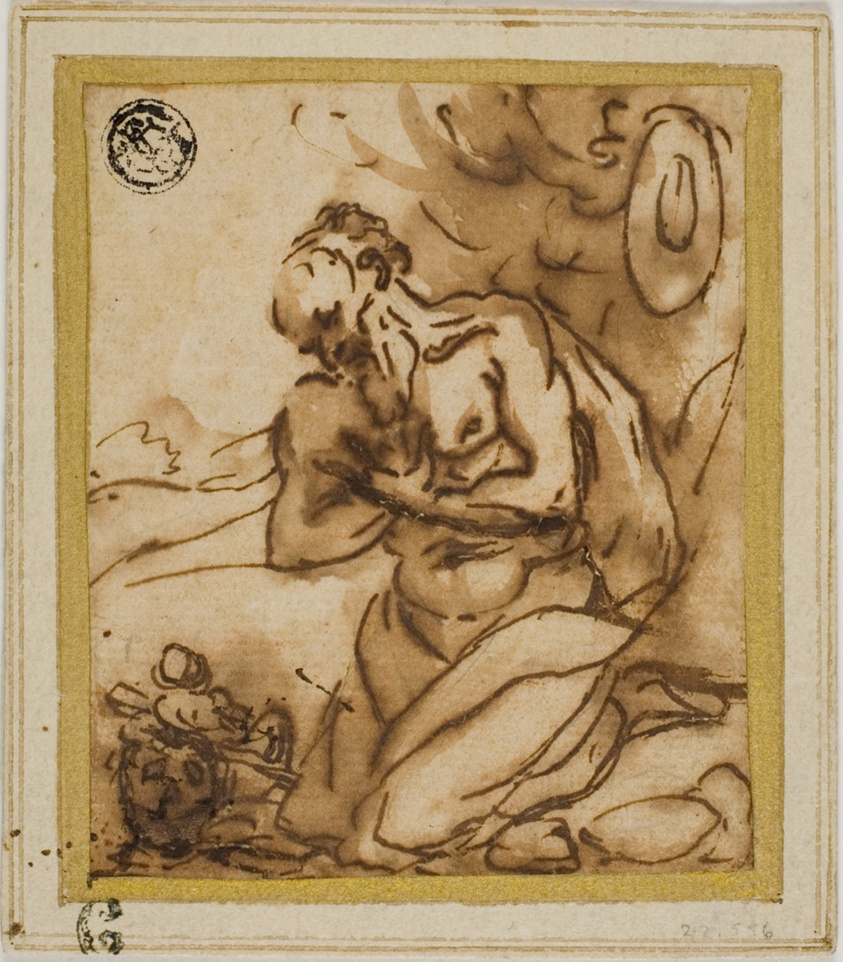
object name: Drawing and Watercolor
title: Saint Jerome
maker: Style of Pier Francesco Mola (Italian, 1612-1666); or Luca Cambiaso (Italian, 1527-1585)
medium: Pen and iron gall ink, with brush and brown wash, on cream laid paper, laid down on ivory wove card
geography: Italy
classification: pen and ink drawings; drawings (visual works); prints and drawing